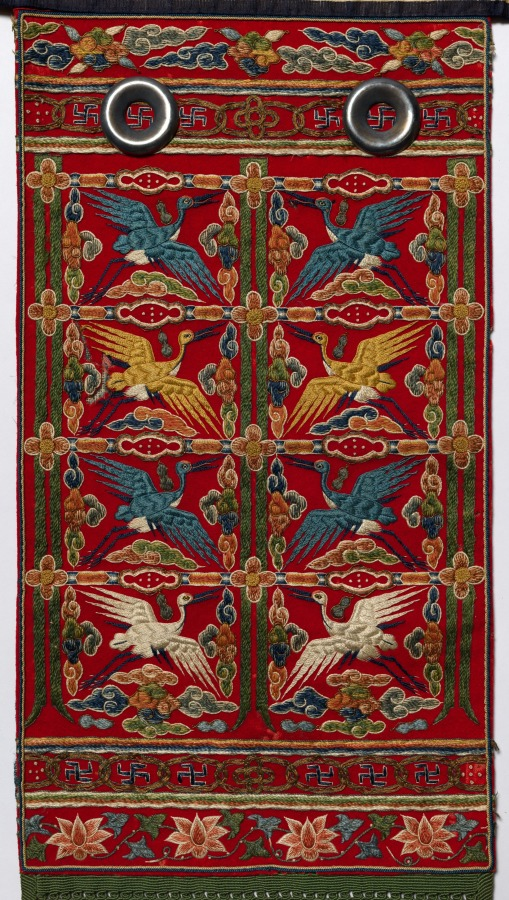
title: Back Apron for the Royal Ceremonial Robe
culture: Korea, Joseon dynasty (1392–1910)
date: late 1800s–early 1900s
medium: red pile weave, wool or silk, embroidered with silk (polychromatic); red silk, gauze weave; white silk, gauze weave; green silk fringe; metal ring embellishments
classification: Garment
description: This is a set of royal ceremonial robe and accessories worn by a high-ranking court official for attending special state ceremonies. The set consists of an inner coat, an outer coat, a skirt, a back apron, a crown, a pair of jade tassels, a tablet, and a belt.